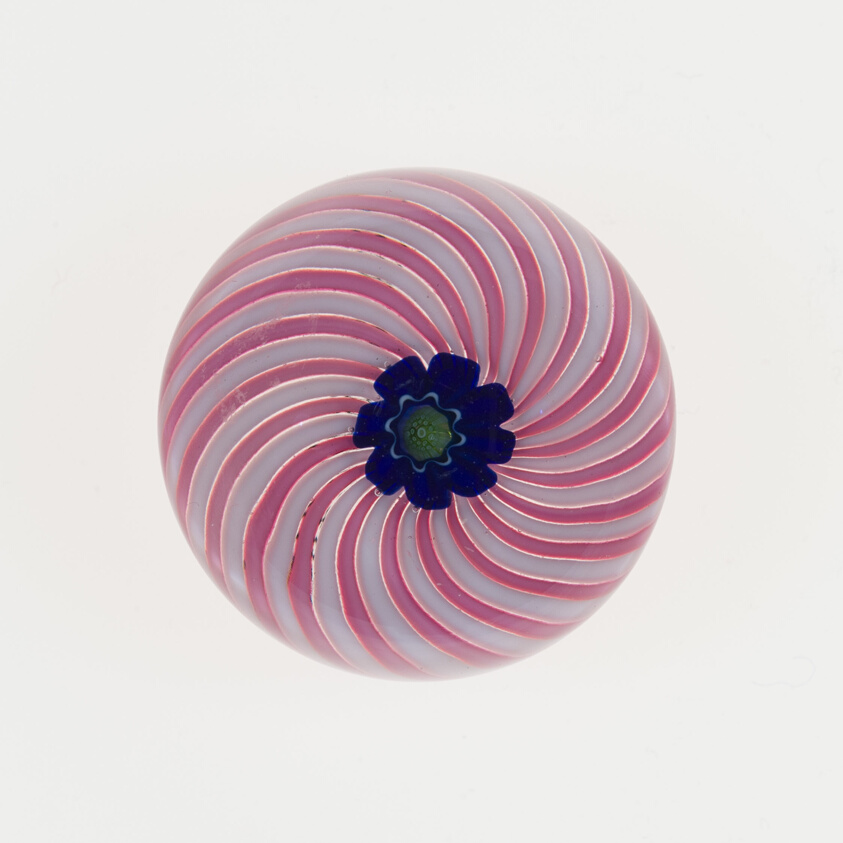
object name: Glass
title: Paperweight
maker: Clichy Glassworks (Cristalleries de Clichy); Clichy, France, 1837-1885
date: c. 1845/60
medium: Glass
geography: France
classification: paperweight; glass